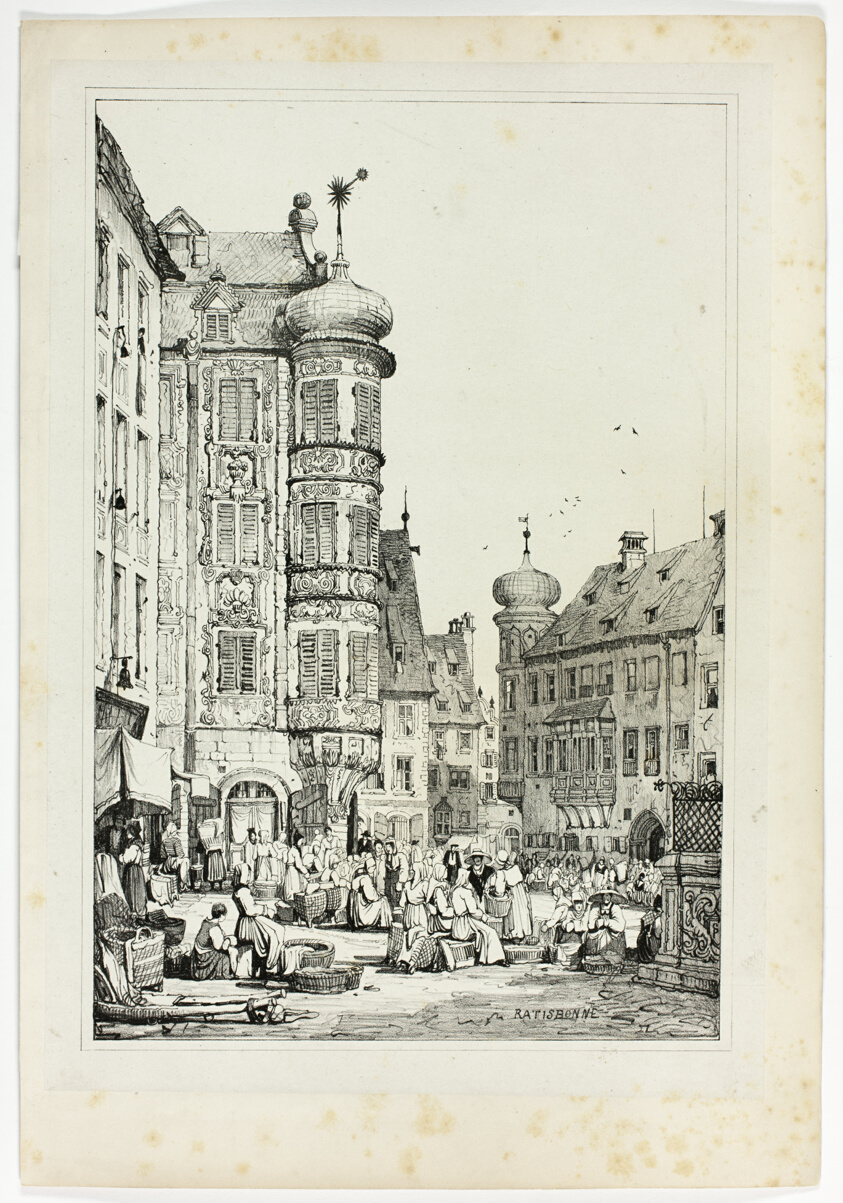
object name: Print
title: Ratisbonne, from Facsimiles of Sketches made in Flanders and Germany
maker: Samuel Prout (English, 1783-1852); printed by Charles Joseph Hullmandel (English, 1789-1850)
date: 1833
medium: Lithograph in black on grayish-ivory chine, laid down on ivory wove paper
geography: England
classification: lithograph; print; prints and drawing